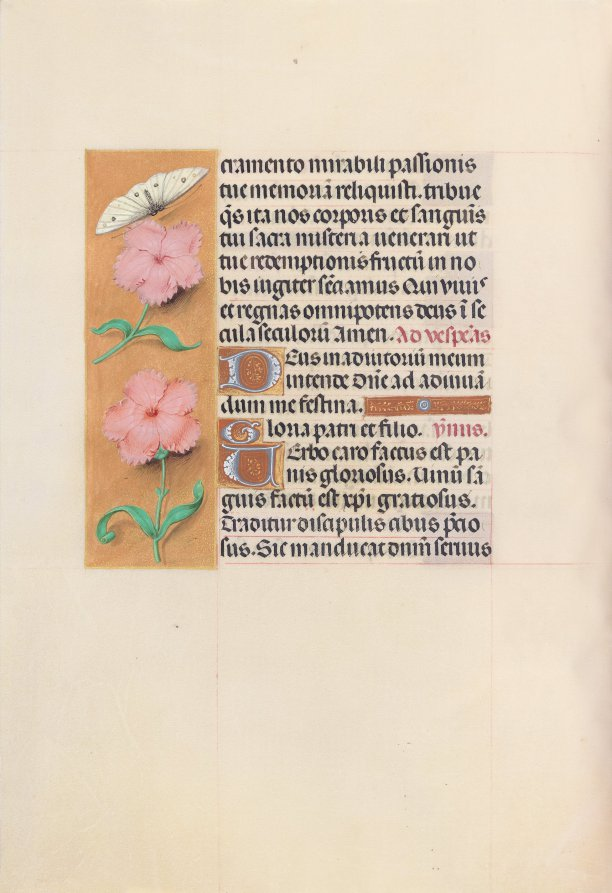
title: Hours of Queen Isabella the Catholic, Queen of Spain: Fol. 47v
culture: Flanders, Ghent and Bruges, late 15th century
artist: Master of the First Prayerbook of Maximillian (Flemish, c. 1444–1519)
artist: and Associates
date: c. 1500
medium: ink, tempera, and gold on vellum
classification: Bound Volume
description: This manuscript was illuminated by a circle of at least five highly organized manuscript painters active in the Flemish cities of Ghent and Bruges. The principal illuminator was Alexander Bening, who painted the majority of the book's miniatures. Manuscripts produced by this circle of artists are renowned for the decoration of their borders, which typically feature a rich variety of realistically-painted flowers, birds, and butterflies. This prayer book, called a book of hours, was intended not for a cleric, but for the private devotions of a lay person-in this case, Isabella the Catholic, Queen of Spain (1451-1504). Isabella's coat of arms embellishes the book's frontispiece. It is unlikely that the book was commissioned by the Queen herself; rather, she probably received it as a diplomatic gift from someone courting her patronage, perhaps Cardinal Francisco Jimenez de Cisneros. A Franciscan friar, Jimenez was dependent upon Isabella for his advancement, first to the post of Queen's confessor in 1492, and then to Archbishop of Toledo in 1495.